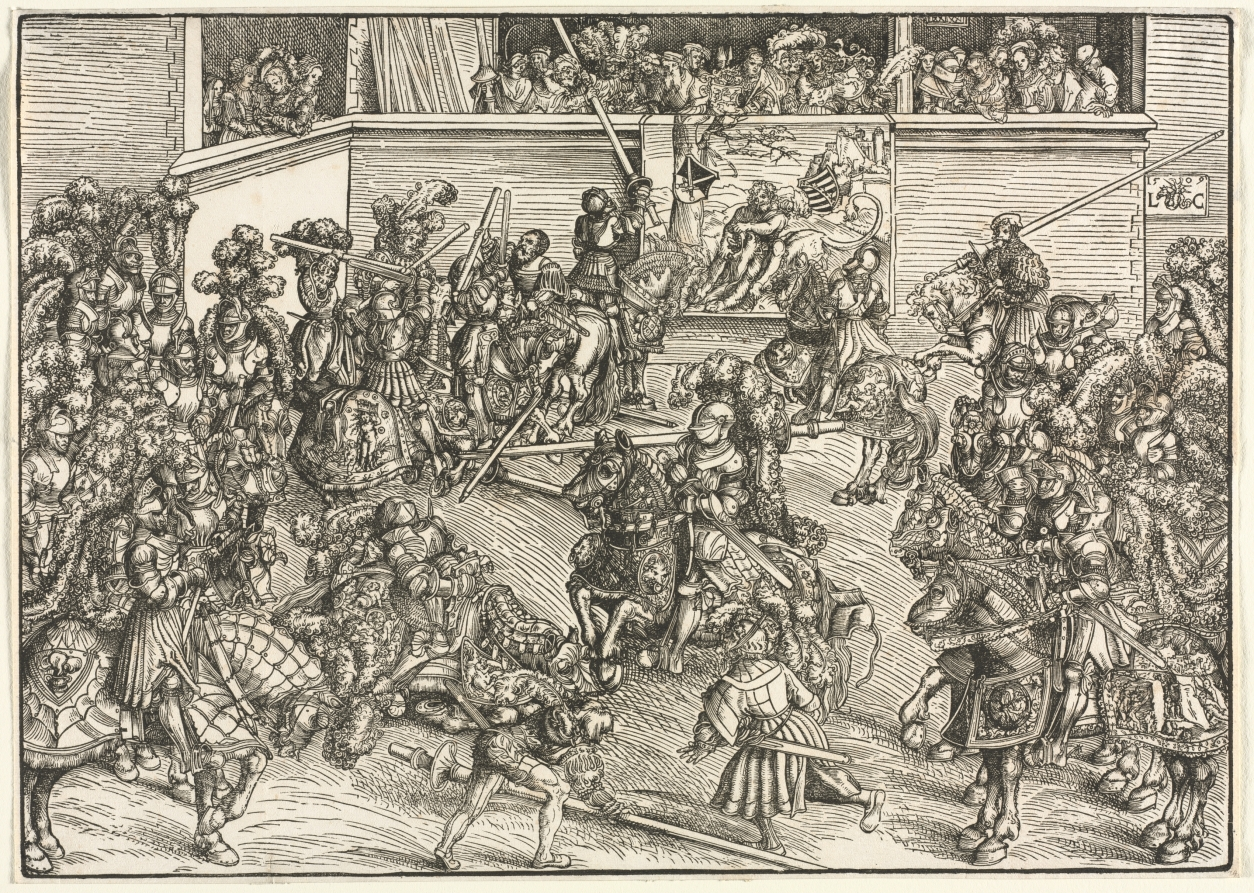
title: The Second Tournament with the Tapestry of Sampson and the Lion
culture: Germany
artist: Lucas Cranach (German, 1472–1553)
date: 1509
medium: woodcut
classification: Print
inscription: upper right, in block: 1509 / LC[in monogram with winged serpent] ; lower right, in graphite: 24 ; VERSO, lower center, in graphite: HB 48 (2) L. 85 / 126